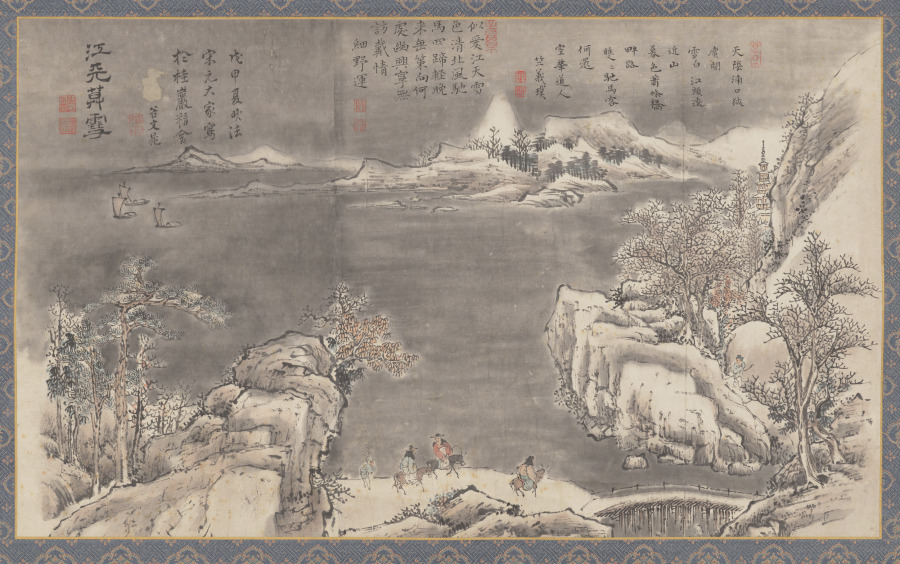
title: Evening Snow Blending River and Sky, from Eight Views of Xiao-Xiang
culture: Japan, Edo period (1615–1868)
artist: Tani Bunchō (Japanese, 1763–1841)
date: 1788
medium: album leaf remounted as a hanging scroll; ink and color on paper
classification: Painting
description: This painting was part of a set of album leaves representing the Eight Views of Xiao-Xiang, a theme originating in Chinese poetry and painting that spread to both Korea and Japan. Southern China’s Xiao-Xiang area, where the mist-covered banks of the Xiang River created a complex landscape shifting like the moods and minds of people, captured the imaginations of generations of painters and calligraphers. Inscriptions on these works suggest that they were possibly ordered by newly prominent Japanese Confucian scholars.